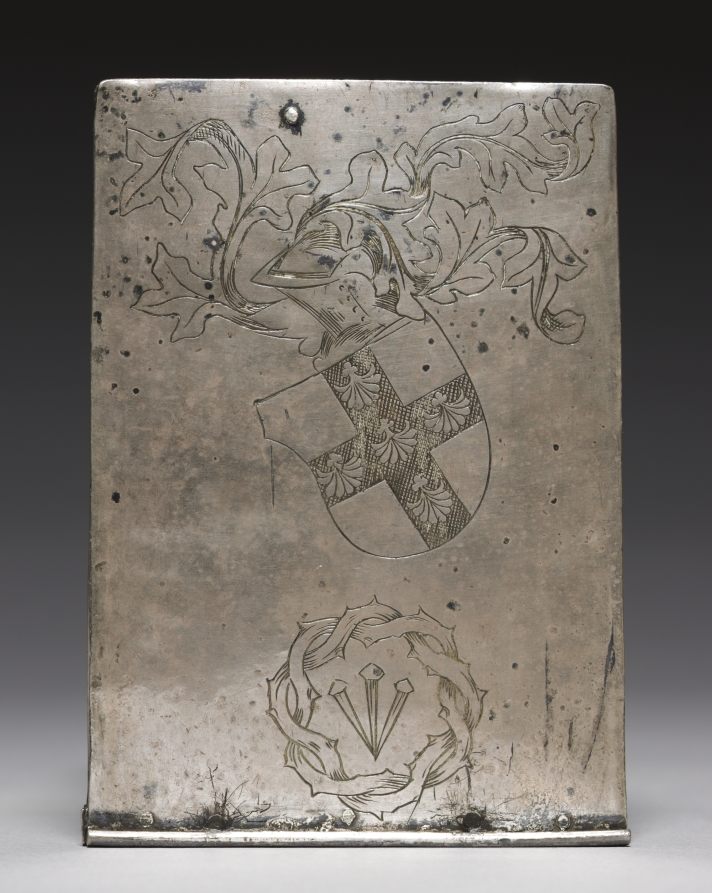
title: Plaque: Christ Carrying the Cross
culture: Germany, Lower Rhine, late 15th Century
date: c. 1480–1500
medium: ivory with traces of color and gold, mounted in silver frame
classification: Ivory